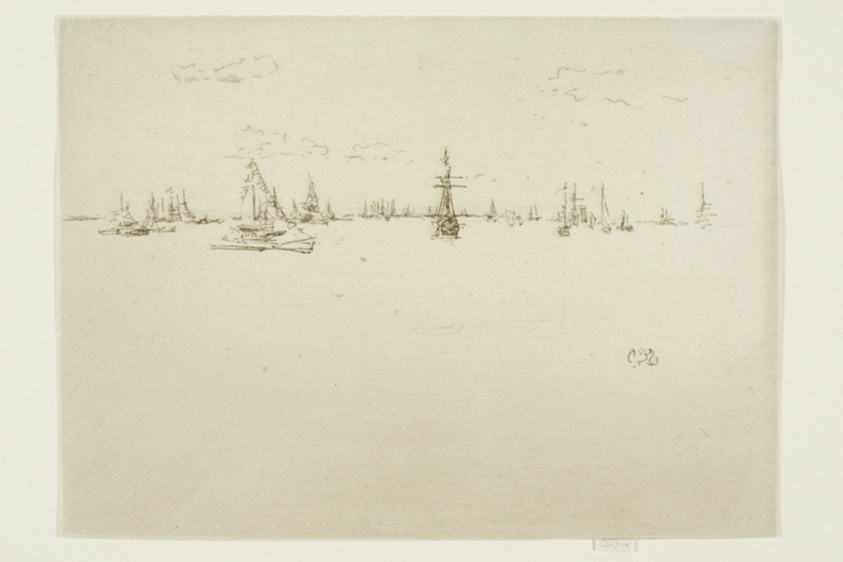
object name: Print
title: The Turret Ship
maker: James McNeill Whistler (American, 1834-1903)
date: 1887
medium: Etching and drypoint in black ink on cream laid paper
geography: United States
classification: etching; drypoint; print; prints and drawing; paper